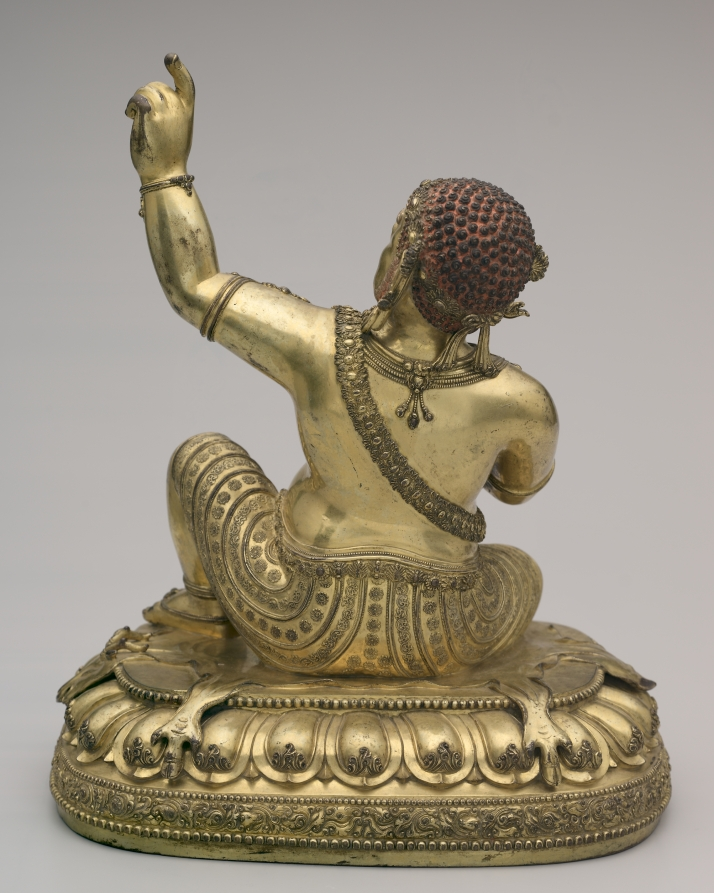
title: Virupa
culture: China, Ming dynasty (1368-1644), Yongle reign (1403-1424)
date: early 1400s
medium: Gilt bronze with silver, stones, and pigment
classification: Sculpture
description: Virupa is one of the great teachers in the history of tantric Buddhism. His posture references his ability to stop the sun; as an enlightened being, he can control phenomena of nature. As a tantric practitioner, he overturns ordinary assumptions about proper behavior, so he overeats, drinks large quantities of liquor, and waits for the king to pay his bill at the tavern. At the edge of the lotus pedestal is an inscription identifying the image as having been made in the imperial kilns of the third emperor of the Ming dynasty in China as a gift to a Tibetan monastic leader. While closely linked to Tibetan styles, the luxurious detailing, special gilding process, and the casting of the ornaments onto the body without use of inlay are specifically Chinese characteristics.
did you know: Virupa's clothing and jewelry are embellished with silver and stones, while pigments enhance his hair and eyes.